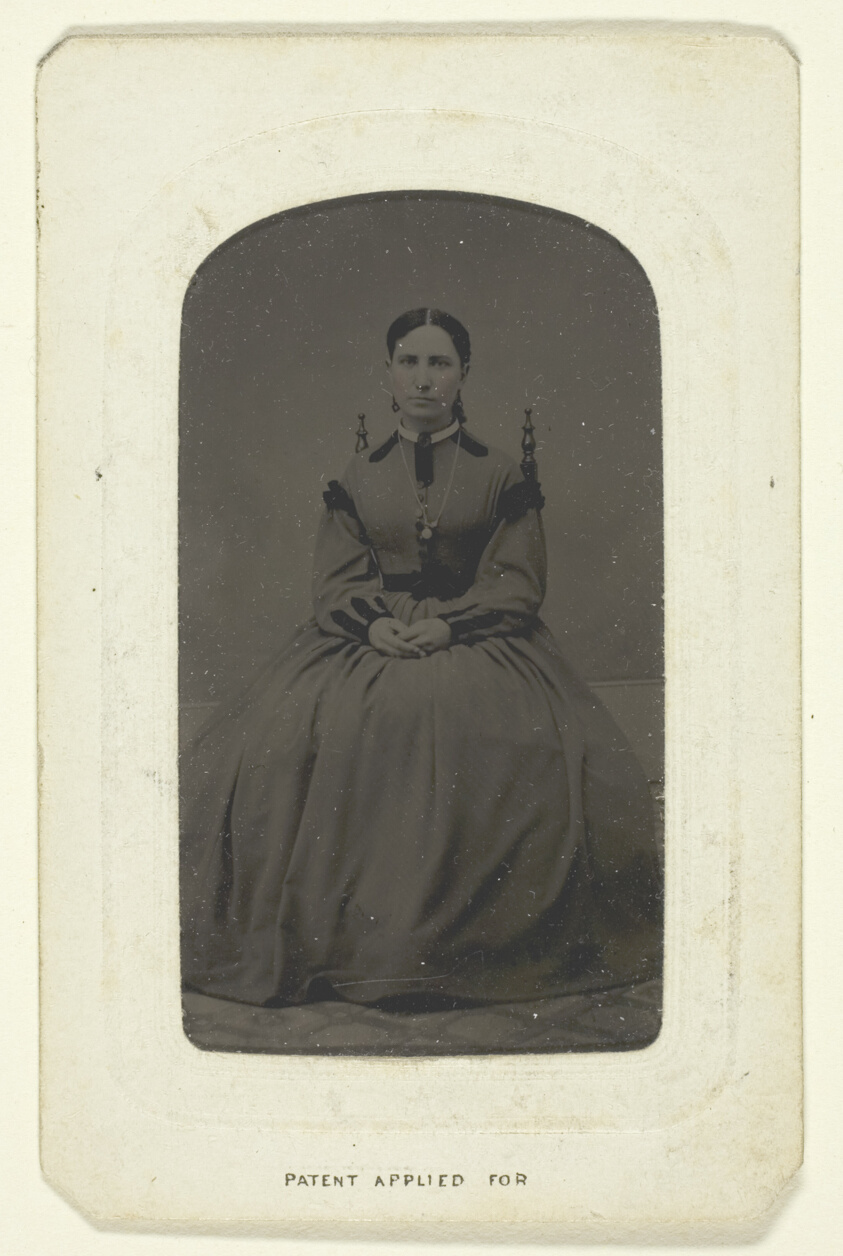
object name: Photograph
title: Untitled (Portrait of a Woman)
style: 19th century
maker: Artist unknown; American, active late 19th century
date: 1840–1900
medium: Tintype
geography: United States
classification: tintype; photographic process; photography; photograph